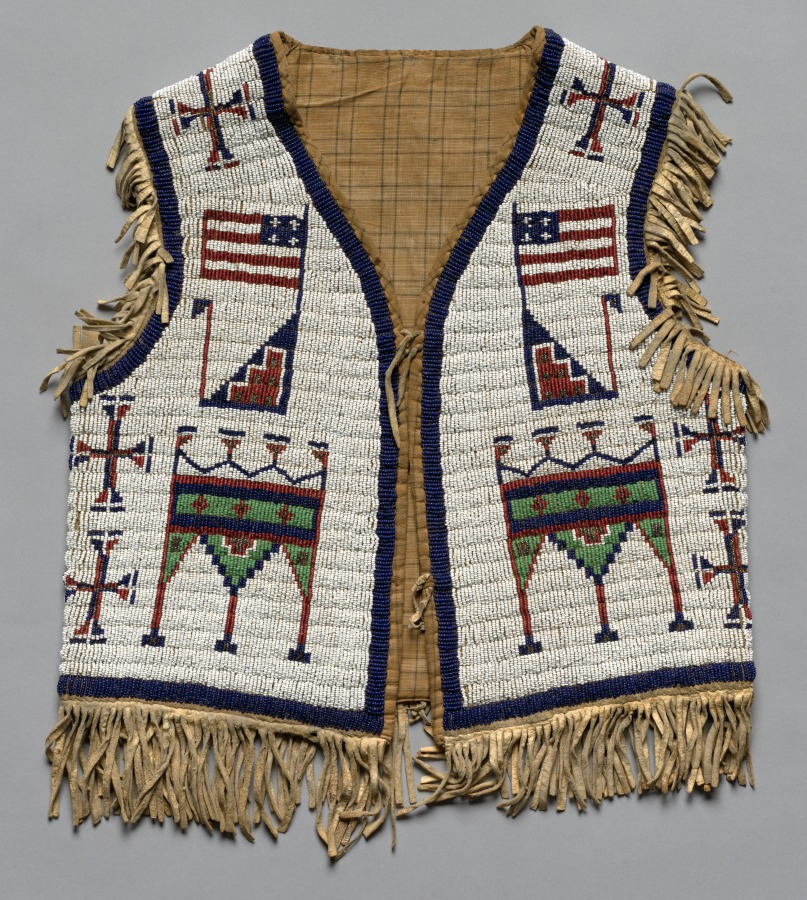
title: Boy's Vest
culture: Plains, Lakota (Sioux), 19th century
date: c. 1880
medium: beadwork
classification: Garment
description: For centuries, beautiful garments and objects have held great meaning for the native groups of the Great Plains. For instance, the Lakota (Sioux) ceremonially intone something sacred wears me. That is, humans don powerful garments but are worn, animated, and protected by the sacred forces within their materials and imagery. By 1700 European Americans began to make their presence felt in the region, and Plains people creatively adopted European materials and garment types into their wardrobes. By 1870 most Plains people had been forced onto reservations, and traditional life shattered—especially for men. The garments on display here all were made after that date.